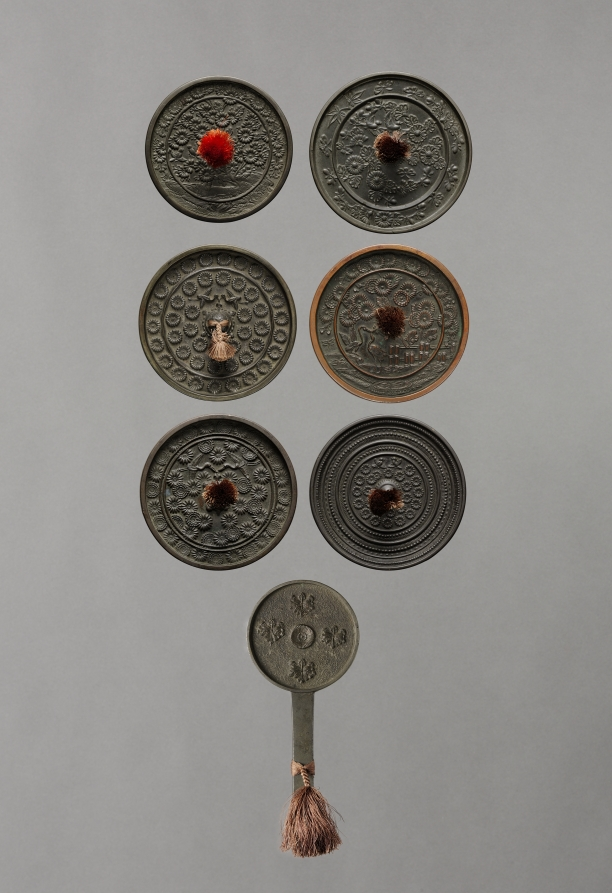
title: Mirror with Pair of Cranes in Chrysanthemum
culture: Japan, Muromachi period (1392–1573)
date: 1400–1573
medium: bronze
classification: Metalwork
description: The Japanese used chrysanthemums as decorative elements on mirrors. In the Heian period, a chrysanthemum with cranes or long-tailed birds was a common motif. Later, in the Kamakura and Muromachi periods, chrysanthemum designs were divided into three patterns with different symbolic associations: Chrysanthemum with Cranes represented longevity; Water Flowing suggested longevity as well as the Noh drama Kikujido, or Chrysanthemum Boy; and East Fence alluded to the poem "Drinking Wine" by Tao Yuanming (AD 365-427). Here, the mirror featuring Buddhist iconography (kyojo) and a chrysanthemum design on the back shows that the flower was also appreciated in the context of Buddhism in the Kamakura period.